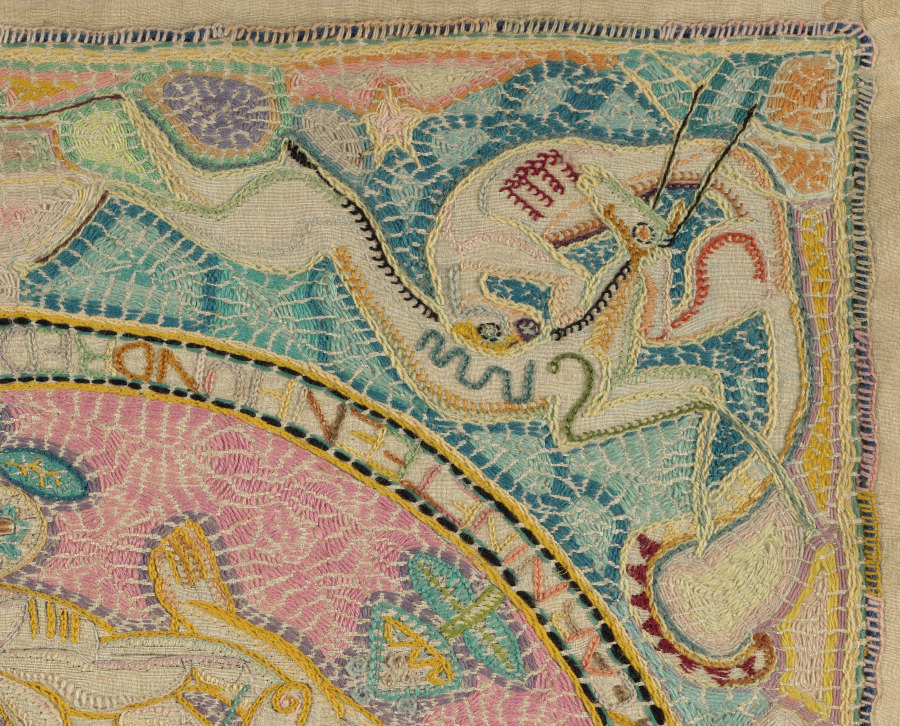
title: The Family (In Memory of a Summer in the White Mountains)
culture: America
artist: Marguerite Zorach (American, 1887–1968)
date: 1917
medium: plain weave silk; wool embroidery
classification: Embroidery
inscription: THE FAMILY / DONE BY MARGUERITE ZORACH IN THE YEAR NINETEEN HUNDRED AND SEVENTEEN IN MEMORY OF A SUMMER IN THE WHITE MOUNTAINS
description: Marguerite Zorach conceived her large, complex embroideries as major artistic statements at a time when the medium was routinely considered “craft,” as opposed to “fine art.” In doing so, she helped to erase such distinctions. One of her most acclaimed works, this example celebrates humanity in harmony with nature, presenting the artist, her husband (a Cleveland-raised sculptor named William Zorach), and their son amid an evergreen tree and four pairs of animals. Very time consuming to create, Zorach’s embroideries are rare.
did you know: In 1925, Zorach served as first president of the New York Society of Women Artists, an organization still in existence.